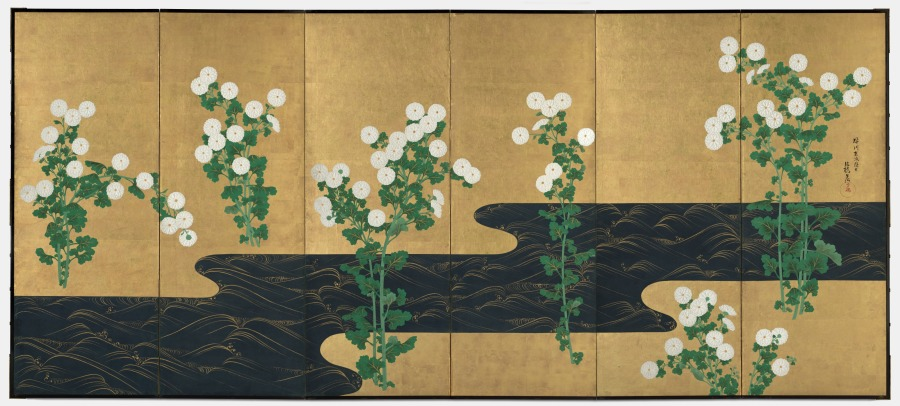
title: Chrysanthemums by a Stream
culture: Japan, Edo period (1615–1868)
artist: possibly by Ogata Kōrin (Japanese, 1658–1716)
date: c. 1715–30 or later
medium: One of a pair of six-panel folding screens; ink and color on gilded paper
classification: Painting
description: These screens recall a painting style so closely identified with Ogata Kōrin (1658–1716) that it is called Rinpa, or “Rin School,” after the ideograph “rin” in his name. The highly stylized background accentuates floral groupings that have been groomed so as to appear utterly artificial, like the synthetic arrangements available today. Kōrin's genius derived in large measure from natural phenomena painstakingly observed and then manipulated to create compositions of startling refinement and sparkling isolation. This process may have grown out of Kōrin's early immersion in the family textile business, a medium that encourages such dramatic distillations of form: the stream's gold-crested waves bring to mind traditional kimono robe designs of Kōrin's era. Works with the signature seen on this painting, including a style name, or persona suggested to Kōrin by his brother Kenzan (1663–1743), are sometimes considered to have been produced either in the last year of his life, when he was very ill, or after his death. In both scenarios, the lion’s share of the work would have been done by studio assistants, but little is truly known of his studio practice. Given the regularity of the gold waves on the stream, and the tension in the arrangement of the chrysanthemums, it is also possible that the screens were made in emulation of Kōrin's designs by a later artist.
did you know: The signature used on these screens may indicate paintings made in the last year of the artist's life, or works completed by his studio after his death.